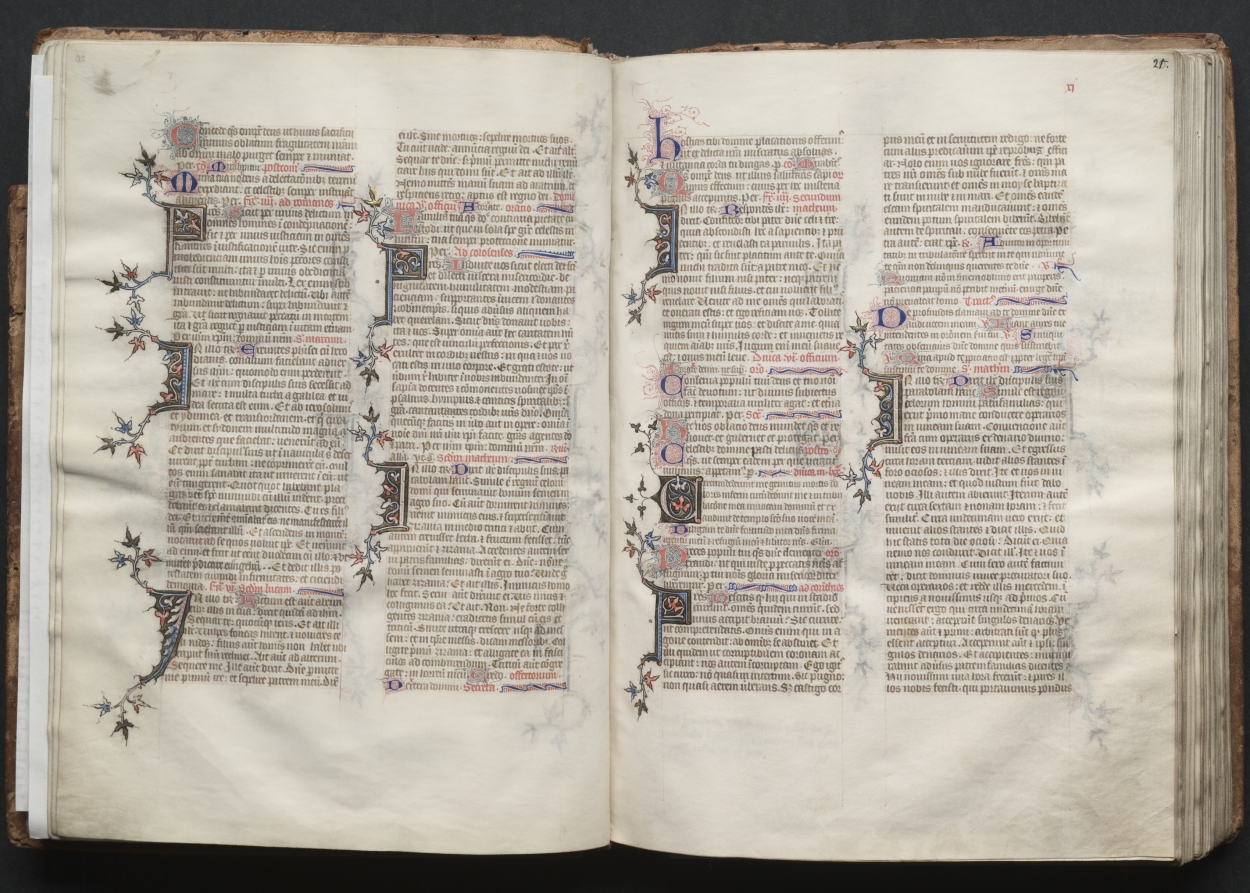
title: The Gotha Missal: Fol. 21r, Text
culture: France, Paris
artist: Master of the Boqueteaux (French)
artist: and Workshop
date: c. 1375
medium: ink, tempera, and gold on vellum; blind-tooled leather binding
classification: Bound Volume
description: The style and quality of this manuscript's decoration is typical of deluxe Parisian books made for aristocratic or royal patrons. Most of the book's decoration appears to be the work of the Master of the Boqueteaux, an artist active at the court of King Charles V (died 1380). His style was apparently shared by a number of book illuminators working in and around Paris. It is very possible that the Gotha Missal belonged to Charles V, but is not provable because the manuscript has no royal portraits and lacks a colophon. Given the book's magnificent decoration, however, it would seem that it was produced for a Valois prince, if not for the king himself. The manuscript receives its name from the German dukes of Gotha, its later owners.